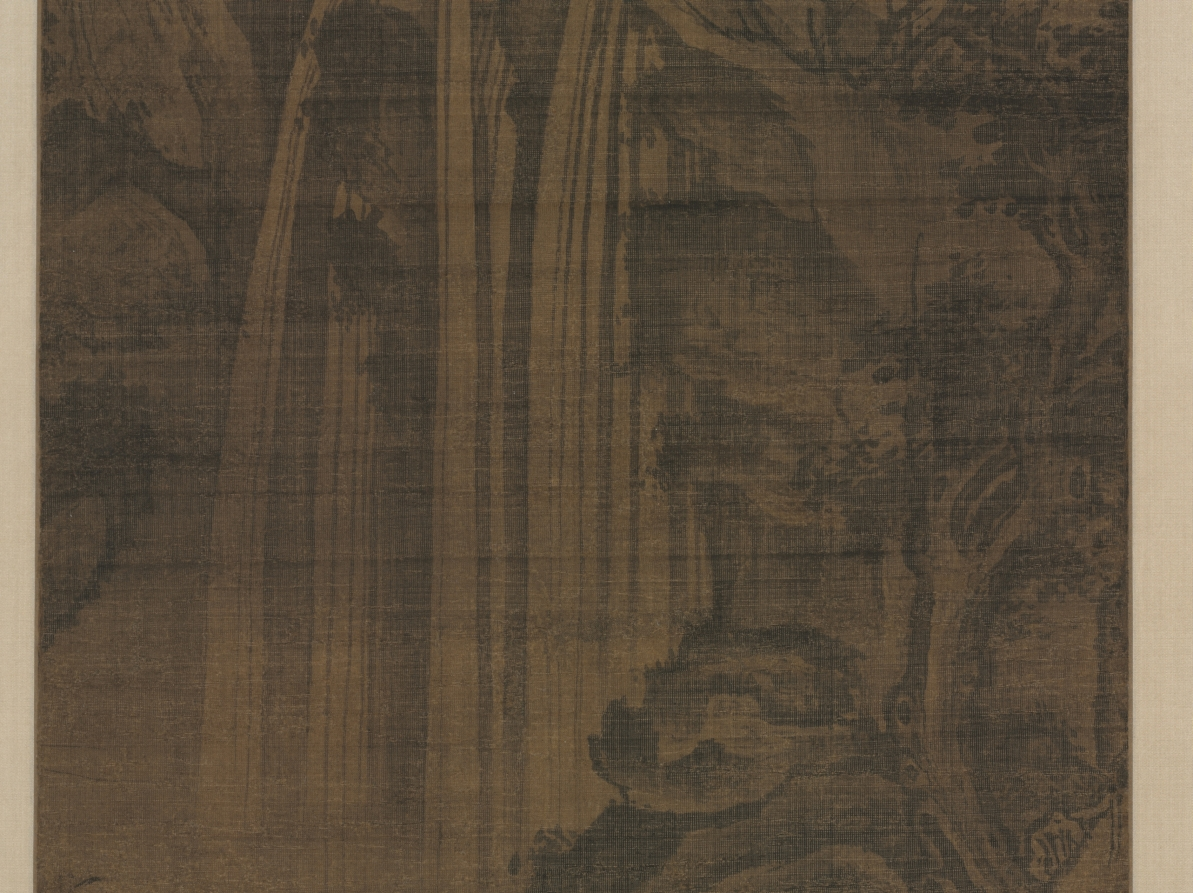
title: Waterfall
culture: China, Song dynasty (960-1279) - Yuan dynasty (1271-1368)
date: 1271–1368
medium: hanging scroll, ink and slight color on silk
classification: Painting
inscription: Label on the mounting with 2 seals of T'ang ? of Pi-ling (16th c.); label on back of mounting of Kü Kuang-hsü (1731-1797). 1 colophon and 8 additional seals: 1 colophon, dated 1625, and 2 seals of Kao P'an-lung (1562-1626); 2 seals of Liu Shu (1759-1816); 1 seal of Pi Lung (late 18th c.); 1 seal of Ts'ao tzu-wen; 2 seals unidentified. WKH